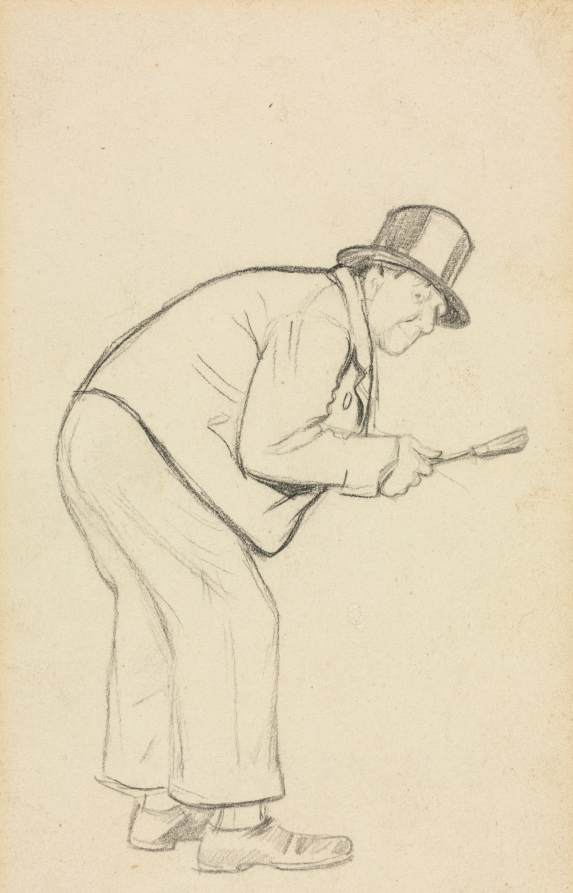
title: Study for "A Woman Hater"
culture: England, 19th century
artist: Charles Samuel Keene (British, 1823–1891)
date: c. 1851–91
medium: graphite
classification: Drawing